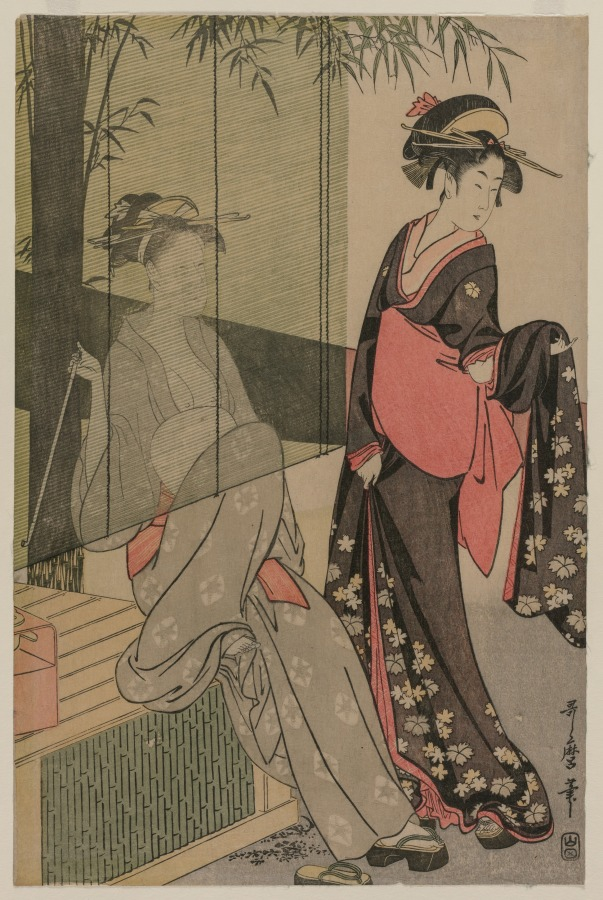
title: Two Women by a Bamboo Blind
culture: Japan, Edo period (1615–1868)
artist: Kitagawa Utamaro (Japanese, c. 1754–1806)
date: c. 1797 or 1798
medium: color woodblock print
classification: Print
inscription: Signature: Utamaro hitsu Publisher: Yamada